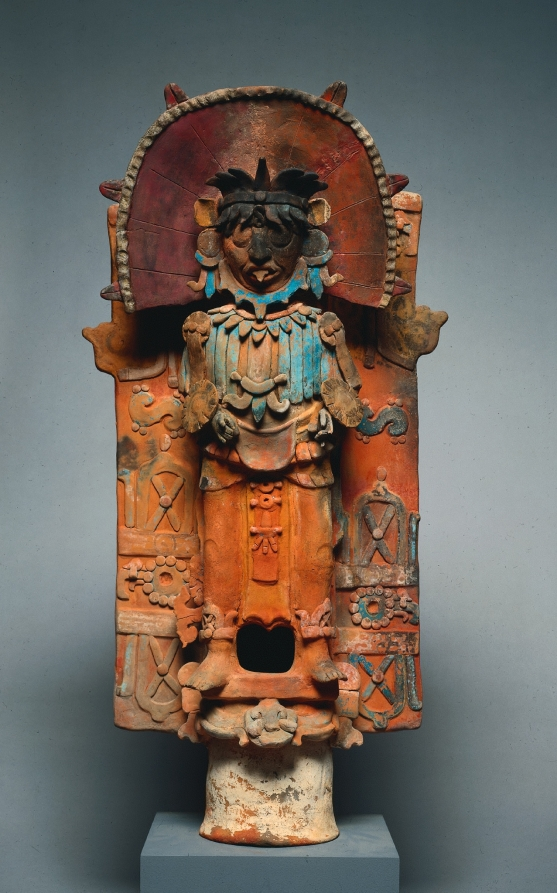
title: Incensario (Incense Burner) Support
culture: Mesoamerica, Maya, Palenque region, Classic Period (250-900) or modern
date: 600–900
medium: earthenware with pigments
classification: Sculpture